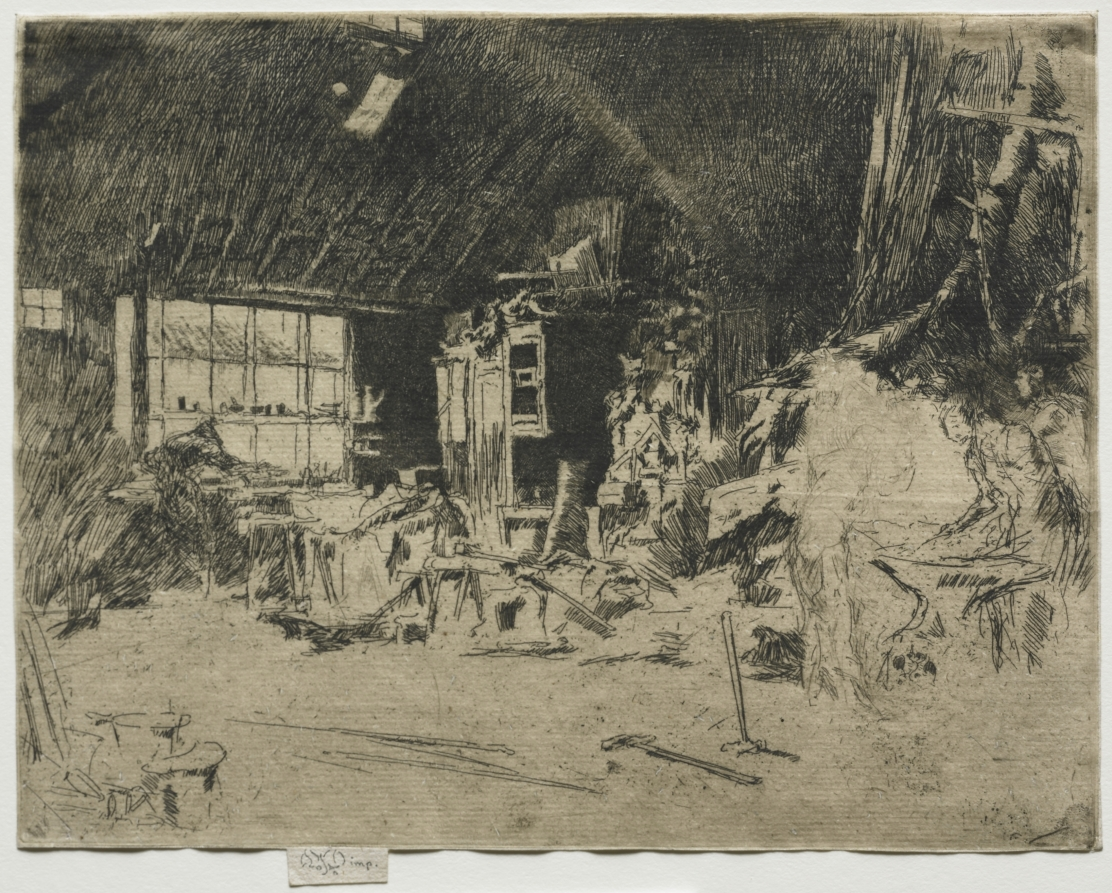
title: The Smithy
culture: America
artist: James McNeill Whistler (American, 1834–1903)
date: 1880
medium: etching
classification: Print